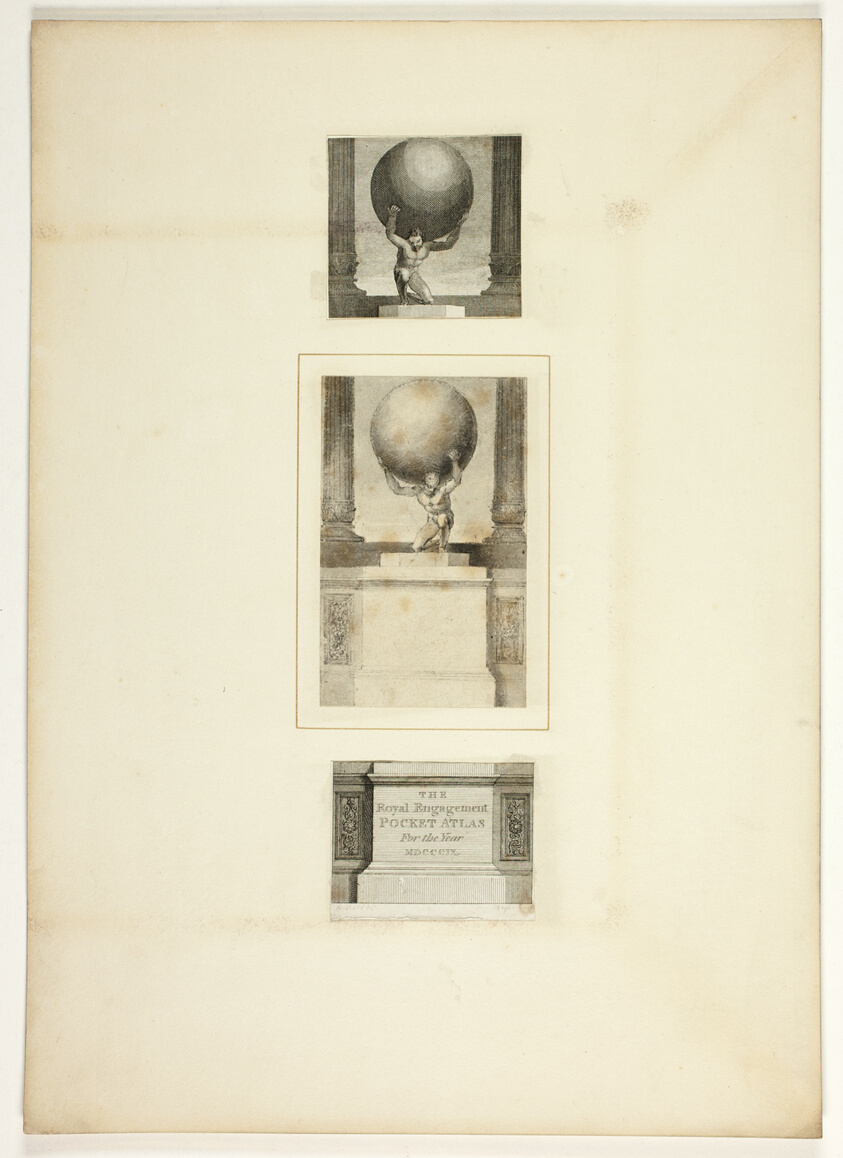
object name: Drawing and Watercolor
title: Study for a plate from Telemachus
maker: Thomas Stothard (English, 1755-1834)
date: c. 1797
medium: Ink wash on paper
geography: England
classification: ink and wash; prints and drawing; paper; drawings (visual works)